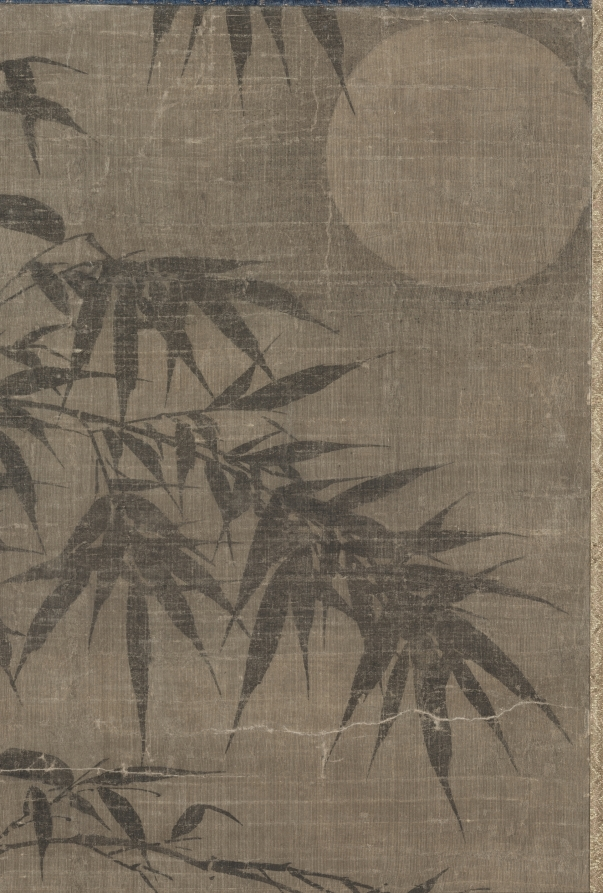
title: Bamboo in Four Seasons: Spring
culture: China, Yuan dynasty (1271-1368)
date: 1279–1368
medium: hanging scroll, ink on silk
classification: Painting